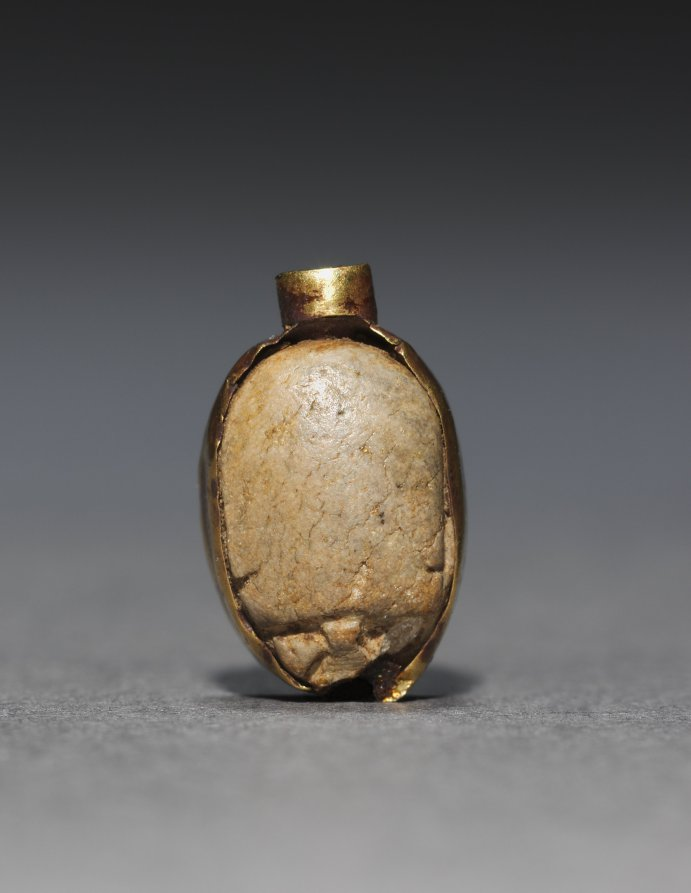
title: Scarab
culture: Egypt, New Kingdom (1540–1069 BCE)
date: 1540–1069 BCE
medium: steatite and gold, originally glazed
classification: Scarabs